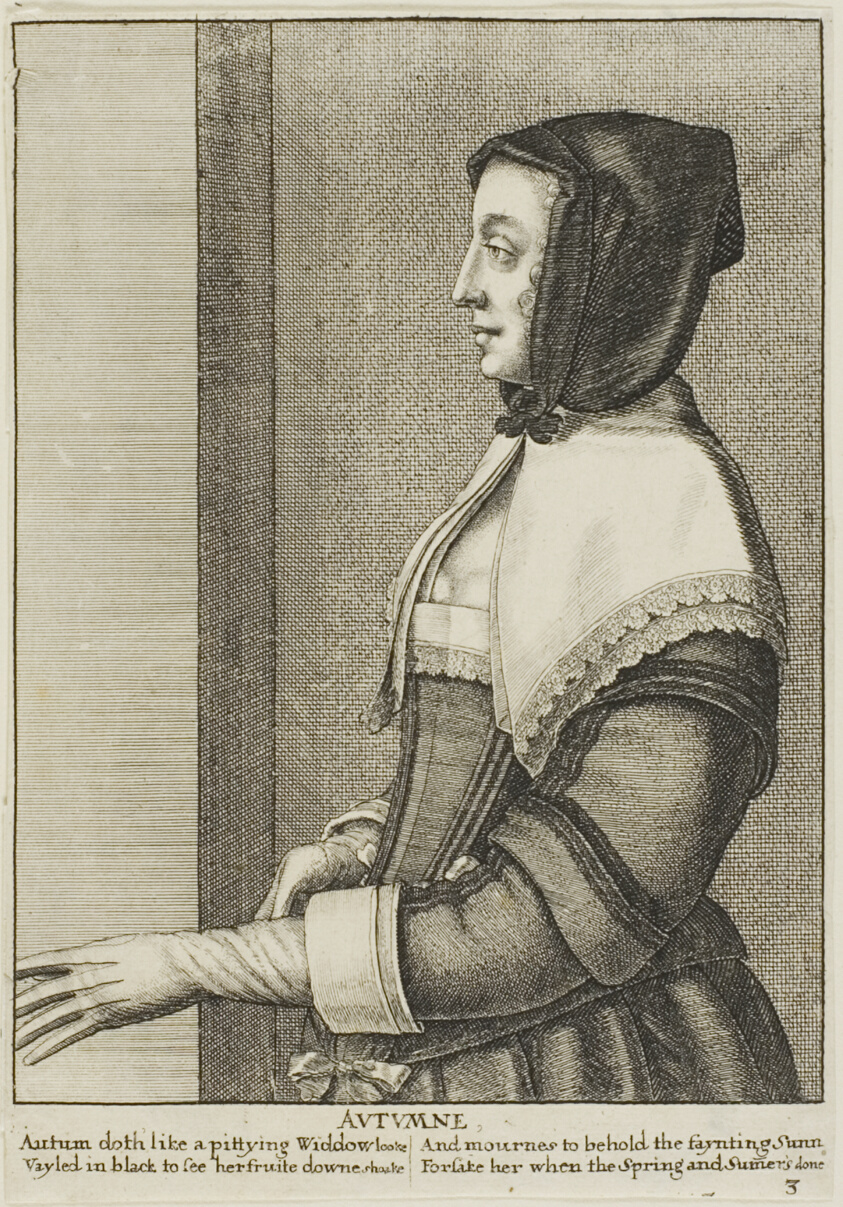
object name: Print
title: Autumn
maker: Wenceslaus Hollar (Bohemian, 1607-1677)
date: 1644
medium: Etching on ivory laid paper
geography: Bohemia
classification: etching; print; prints and drawing